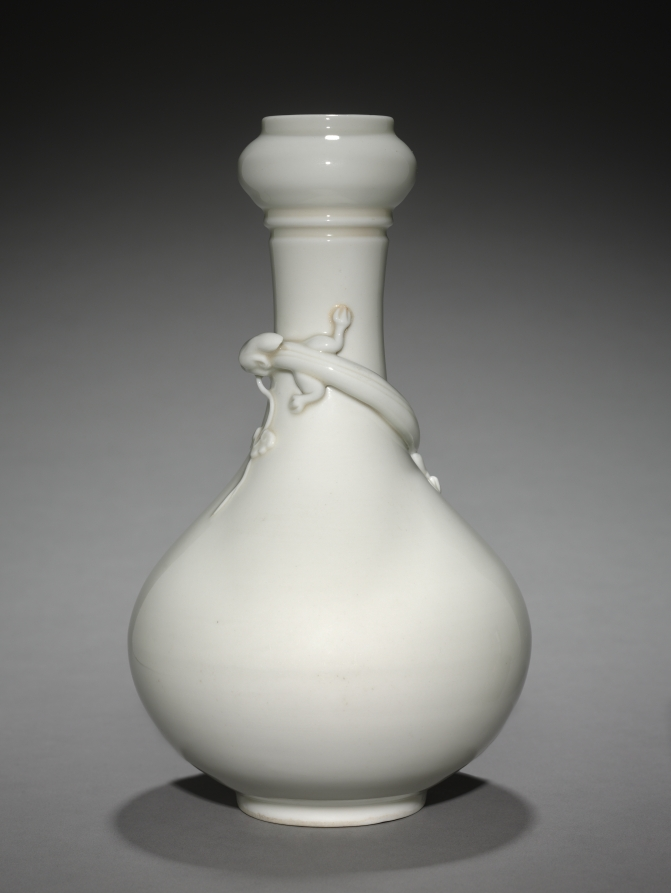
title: Bottle-shaped Vase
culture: China, Qing dynasty (1644-1911), Kangxi reign (1662-1722)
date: 1662–1722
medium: porcelain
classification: Ceramic